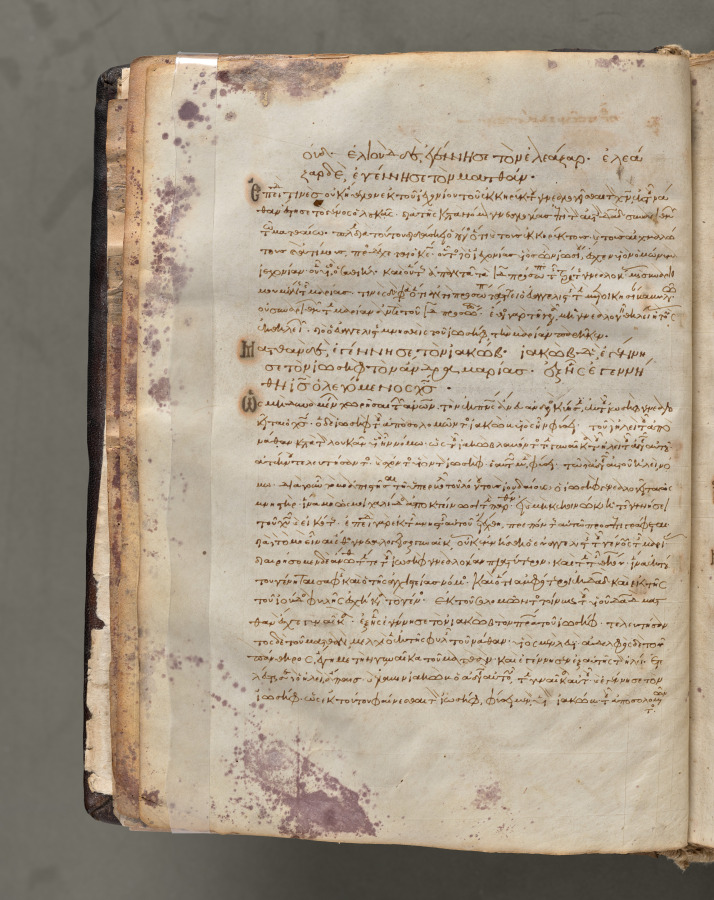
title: Text, folio 7 (verso), from a Gospel Book with Commentaries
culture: Byzantium, Constantinople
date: c. 1000–1100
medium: ink, tempera, and gold on vellum; leather binding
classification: Bound Volume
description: Each of the four gospels in this book opens on a page with brilliantly illuminated borders depicting the author of the text as well as birds-principally peacocks, symbols of the immortality of the soul-and fountains, representing the fountain of life and the salvation of the soul. This volume consists of 428 leaves with texts in Greek. Its level of sophistication suggests that it was probably written and decorated in a monastery in Constantinople.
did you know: Gospel Books were carried in procession through Byzantine churches.